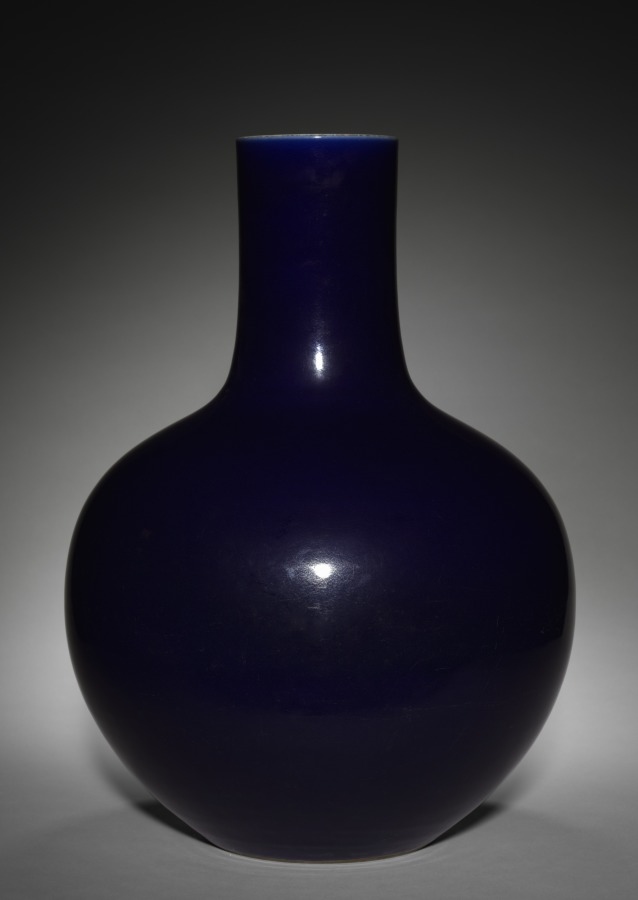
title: Pair of Blue Bottle Vases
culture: China, Qing dynasty (1644-1911), Qianlong mark and reign (1736-95)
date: 1736–95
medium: porcelain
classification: Ceramic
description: In the Qing dynasty (1644–1911), luxury items became more affordable to larger parts of the society, including women, merchants, and literati in nonofficial positions. Imperial patronage and a growing urban population encouraged consumption of luxury goods and local craftmanship. This pair of blue bottle vases exemplify the technical perfection of Qing dynasty court artisans who surpassed their predecessors in technical skill.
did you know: The vase's neck was made separately and subsequently attached to the body.